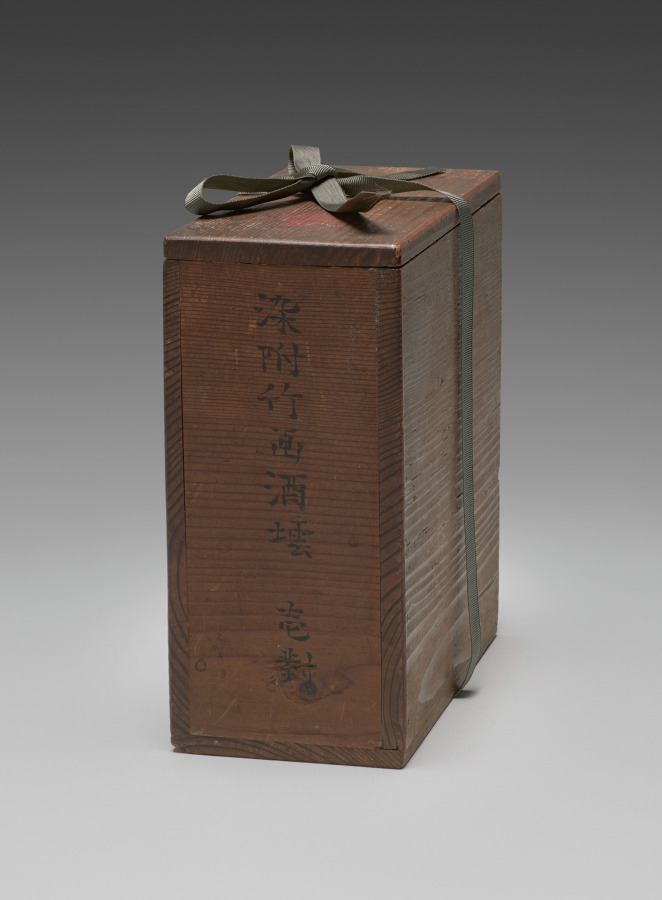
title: Sake Pourers with Bamboo and Bellflowers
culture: Japan, Edo period (1615–1868)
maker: attributed to Seifū Yohei I (Japanese, 1801–1861)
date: c. 1844–57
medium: pair of sake pourers; stoneware with white slip, underglaze blue and gold repair (kintsugi) (Kyoto ware)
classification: Ceramic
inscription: The storage box for the pair of vessels is inscribed and impressed with seals.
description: This pair of sake pourers adorned with with bamboo and bellflowers is attributed to the founder of the Seifū Studio, Seifū Yohei I (1801–1861). Yohei I, the lineage founder, was born to the Yasuda family in the city of Kanazawa, which faces the Sea of Japan. His home province of Kaga (in present-day Ishikawa Prefecture) produced its own ceramics, known as Kutani ware, but for his training as a potter, Yohei I chose Kyoto, which produced the more technically advanced porcelain ware. He moved to Kyoto around the 1820s and became apprenticed to Nin’ami Dohachi, a leading potter in the city. He later struck out on his own, and it is likely that his teacher gave him the name Seifu Yohei. His works include many exquisitely painted copies of Chinese porcelain, and he also produced stoneware with overglaze color enamels that emulated works in the style of Ogata Kenzan (1663–1743) at which his teacher excelled.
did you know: The two pourers are stored together in a bespoke box, which is inscribed and impressed with red seals.